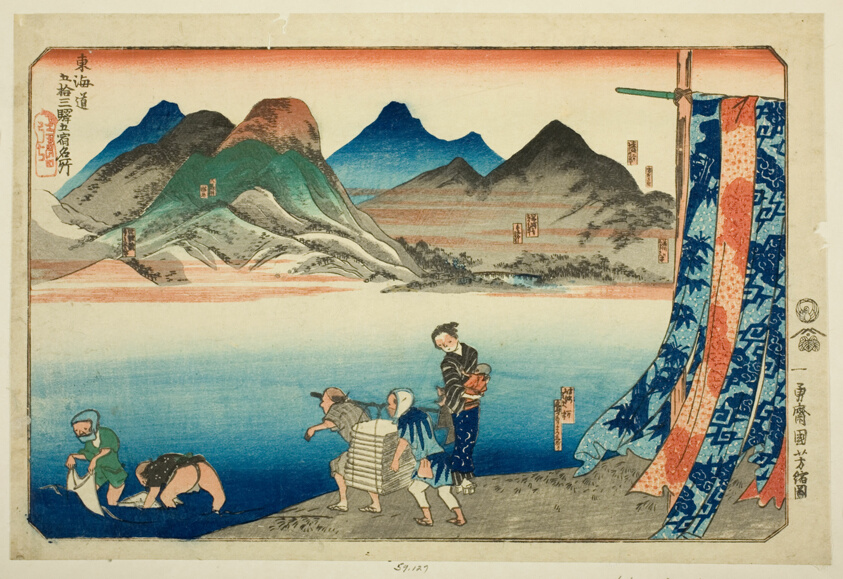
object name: Print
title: Akasaka, Fujikawa, Okazaki, Chiryu, and Narumi, from the series "Famous Places on the Fifty-three Stations of the Tokaido, Five Stations (Tokaido gojusan eki goshuku meisho)"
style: Japanese (culture or style)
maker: Utagawa Kuniyoshi (Japanese, 1797-1861)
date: c. 1830/35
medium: Color woodblock print; oban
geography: Japan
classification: woodblock print; print; asian art